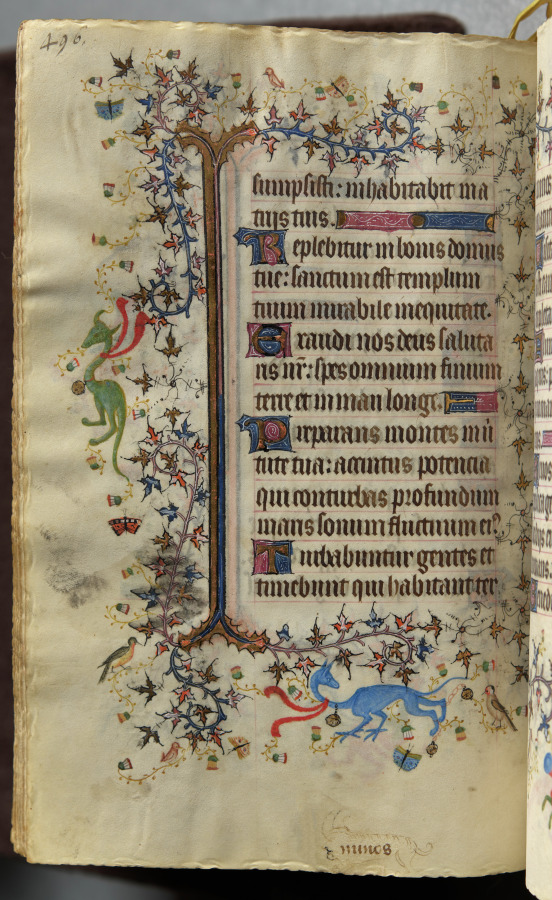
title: Hours of Charles the Noble, King of Navarre (1361-1425): fol. 242v, Text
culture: France, Paris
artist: Master of the Brussels Initials and Associates (French)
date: c. 1405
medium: ink, tempera, and gold on vellum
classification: Bound Volume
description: This precious volume was obviously highly prized by its owner, the French-born King of Navarre, who had his coat of arms painted on no less than twenty folios. Rather than directly commissioning this manuscript from a specific workshop, it seems that Charles the Noble acquired his book of hours -- perhaps ready-made for the luxury market -- while on a trip to Paris in 1404-05. A collaborative effort, six painting styles are evidenced within the pages of this codex, those of two Italians, two Frenchmen, and two Netherlanders. The painter who was responsible for the planning and decoration of the book, and who produced seventeen of the large miniatures, was a Bolognese artist known as the Master of the Brussels Initials. His principal assistant, responsible for most of the borders, was a Florentine who signed his name "Zecho" da Firenze on folio 208 verso.